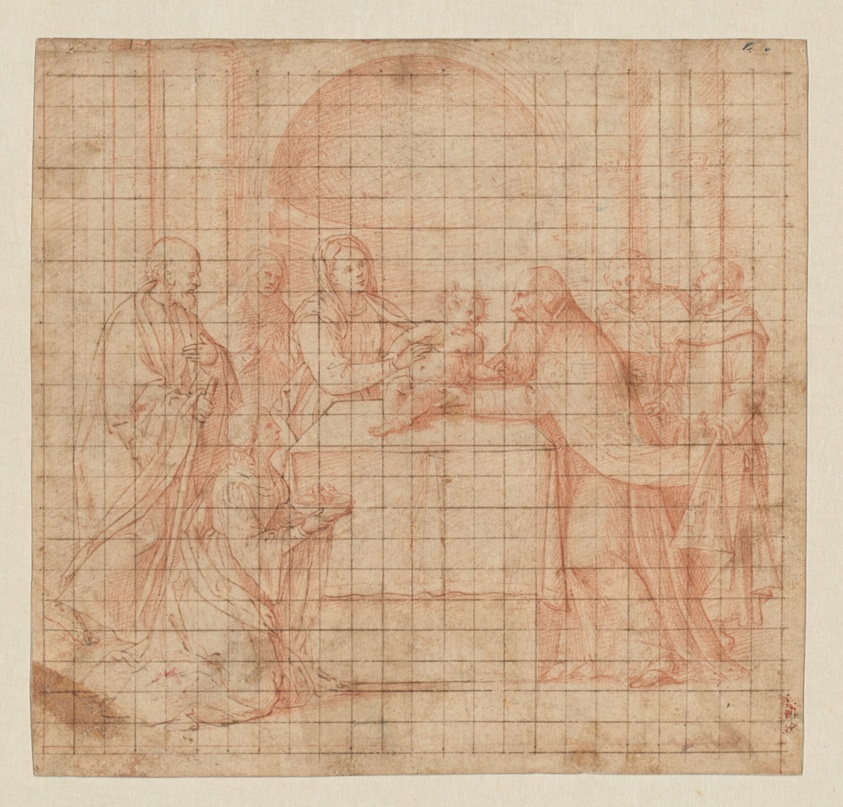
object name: Drawing and Watercolor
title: The Presentation in the Temple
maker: Girolamo da Santacroce (Italian, 1480/85–1556)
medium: Red chalk, with pen and brown ink and traces of black chalk, on cream laid paper, squared in pen and brown ink and ruled along the perimeter in red chalk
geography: Italy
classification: drawings (visual works); paper; prints and drawing